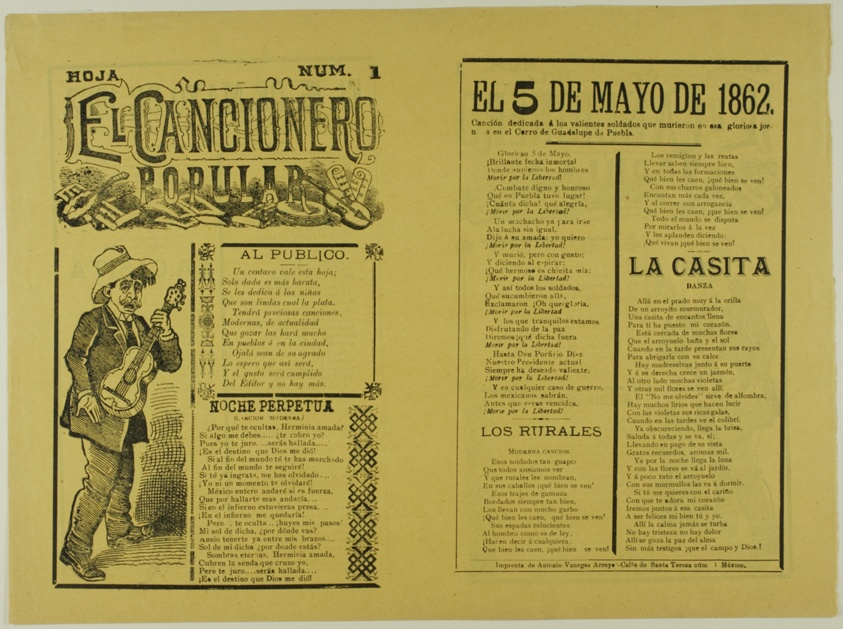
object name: Print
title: El cancionero popular, hoja num. 1 (The Popular Songbook, Sheet No. 1)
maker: José Guadalupe Posada (Mexican, 1852-1913)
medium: Relief print on paper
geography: Mexico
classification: relief etching; print; prints and drawing